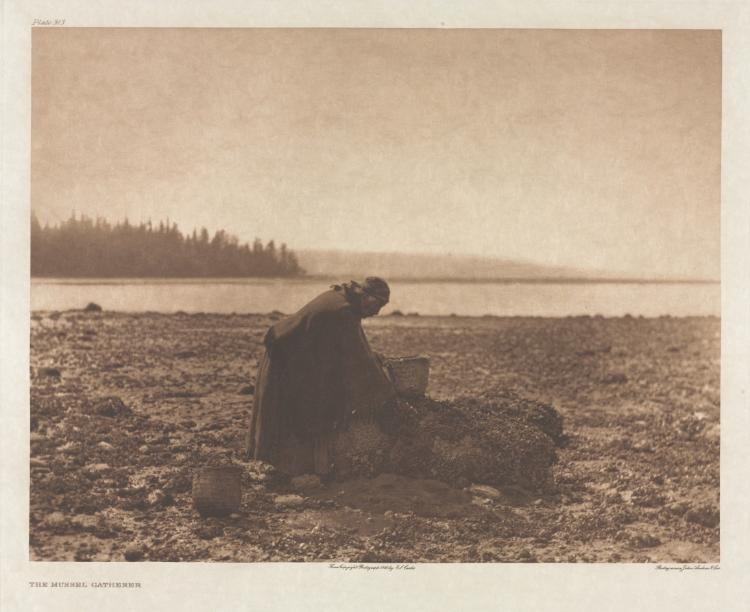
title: Portfolio IX, Plate 313: The Mussel Gatherer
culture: America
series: The North American Indian: being a series of Portfolios picturing and describing the Indians of the United States, the Dominion of Canada, and Alaska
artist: Edward S. Curtis (American, 1868–1952)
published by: The University Press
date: 1900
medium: photogravure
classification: Portfolio